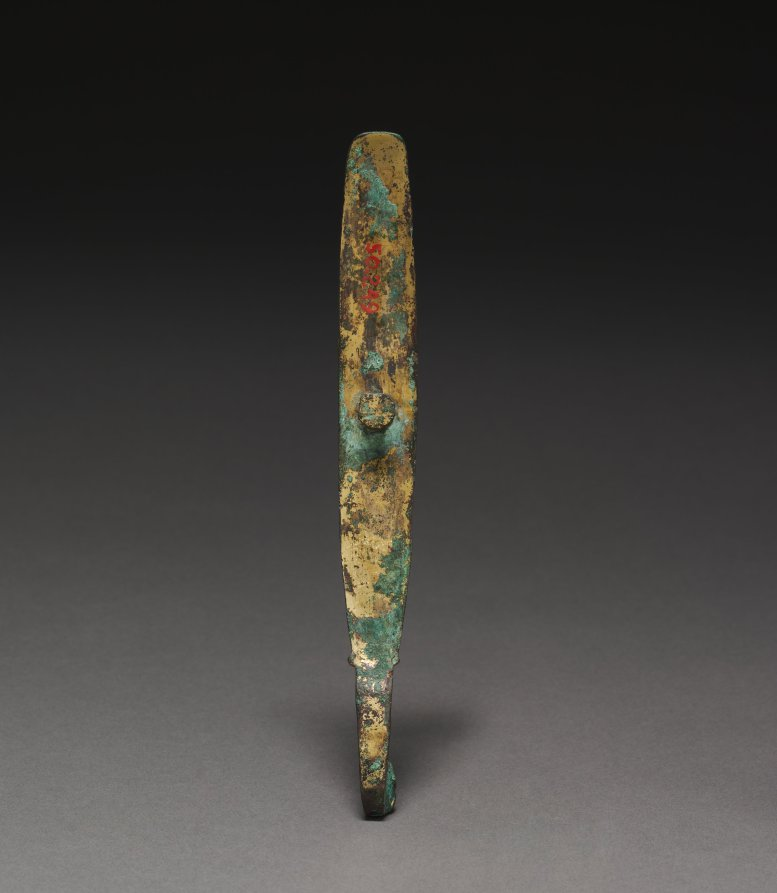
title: Belt Hook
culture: China, Warring States period (475–221 BCE)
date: 475–221 BCE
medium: front: bronze inlaid with gold and turquoise; back: gilt bronze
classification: Metalwork